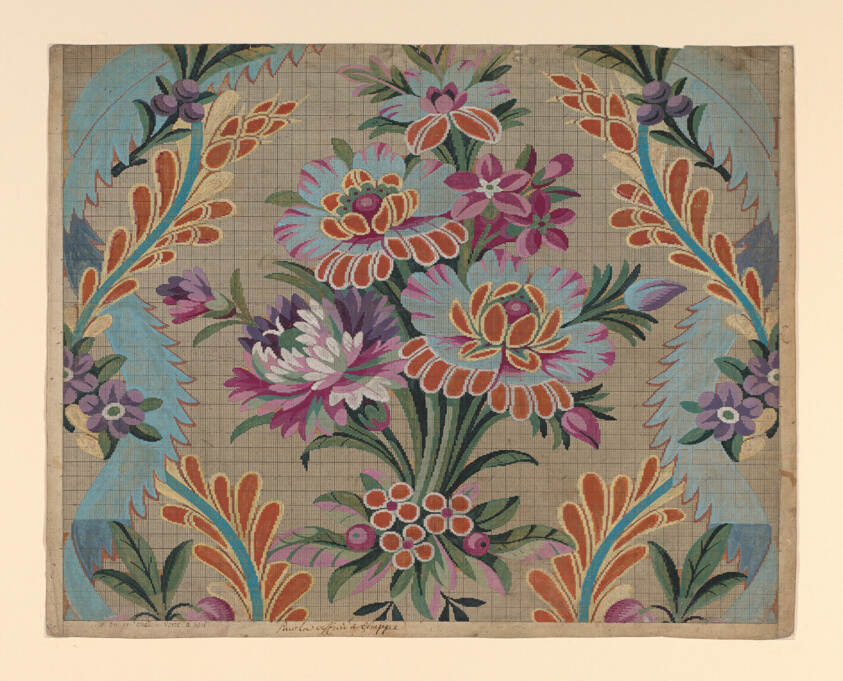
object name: Drawing and Watercolor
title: Mise-en-carte (Point-paper)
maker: France, Lyon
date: 1760/90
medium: Ink and gouache on hand drawn graph paper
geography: France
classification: textile; accessory - paper design